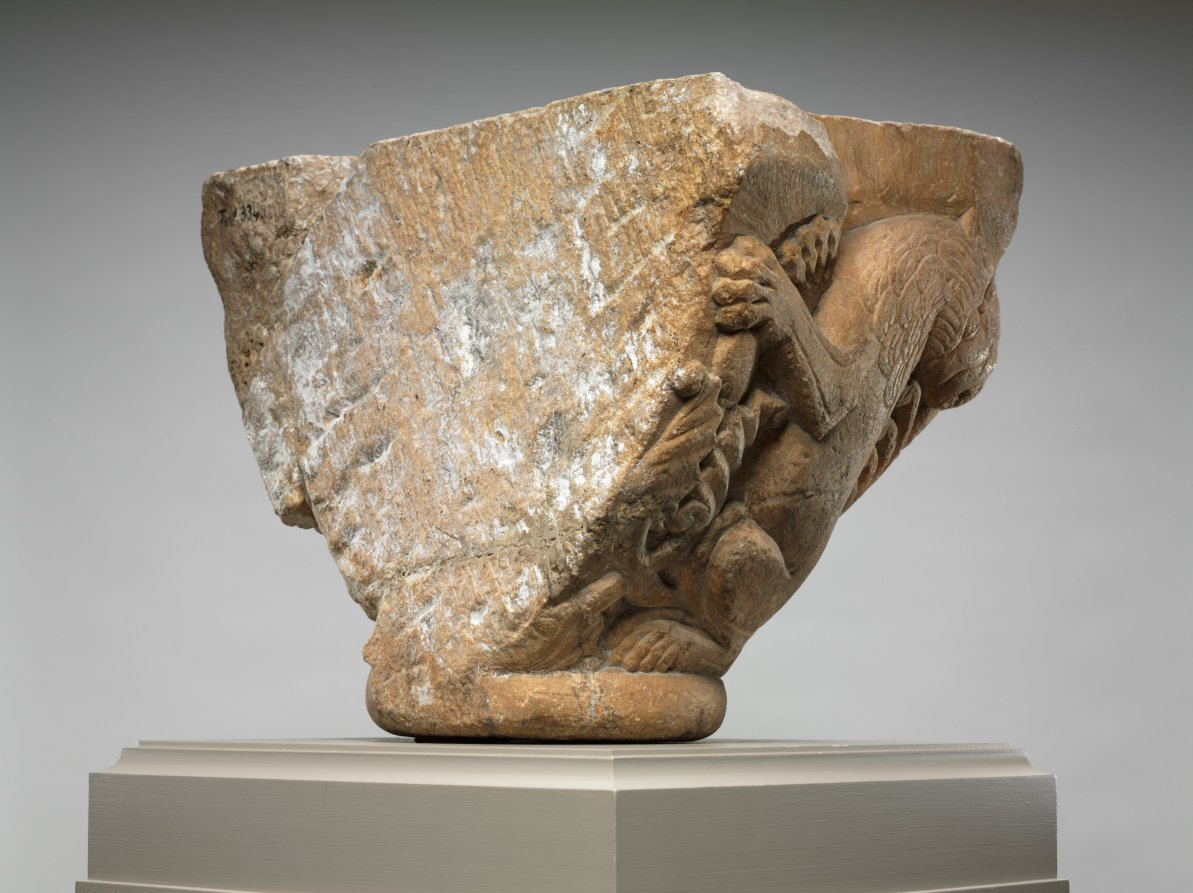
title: Engaged Capital with Lions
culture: Northern Spain (Navarre ?) or Southwest France (Pyrénées or Roussillon ?), mid-12th century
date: 1145–64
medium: marble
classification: Sculpture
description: The compositional motif of confronted and addorsed beasts illustrated on this capital was especially popular in churches along the pilgrimage roads.